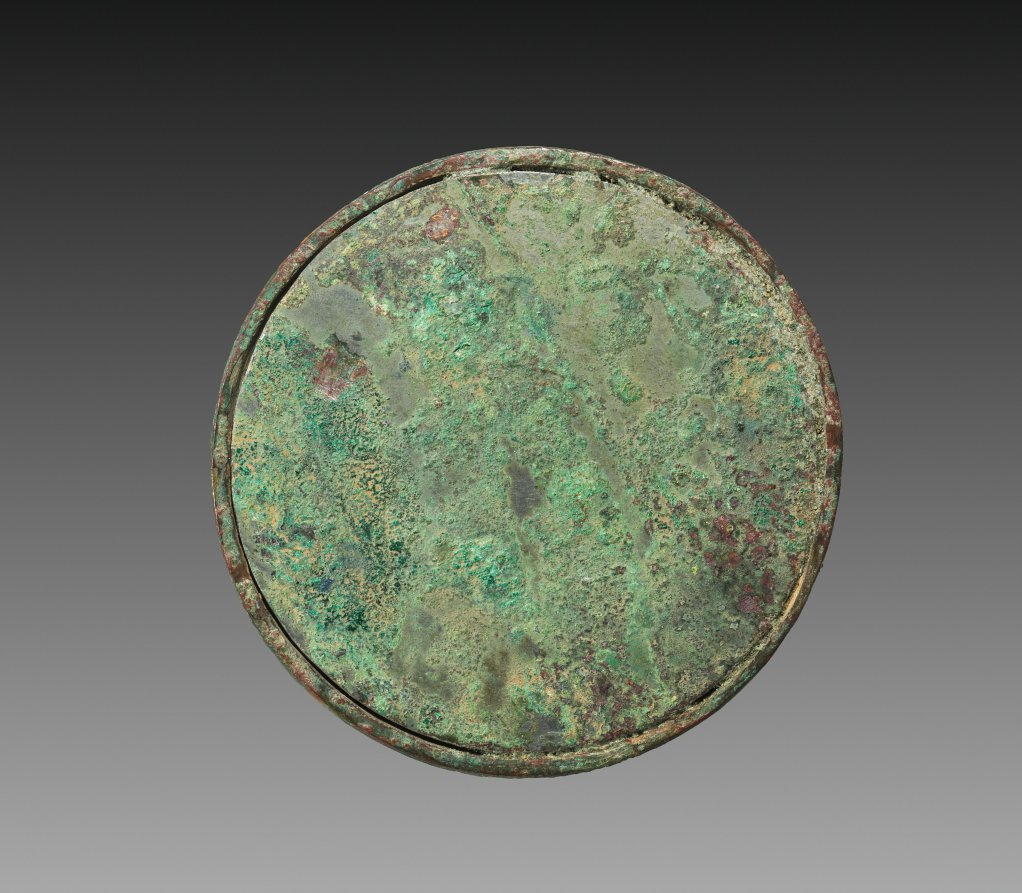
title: Double-tier Mirror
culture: China, Warring States period (475–221 BCE)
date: 300s BCE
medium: bronze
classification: Metalwork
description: The craft of mirror making prospered remarkably during the Warring States period, as bronzes increasingly served as luxury items for individuals. A variety of ornamentations appear on the backs of mirrors, some of which bear resemblance to those found in contemporary jades, lacquer wares, and textiles—all luxury items of the day. This tiny round mirror belongs to the rare double-cast type. It consists of two different layers: a reflective disc with a central knob at the back, and a ring with openwork designs of undulating serpents.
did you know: This luxury object consists of two different layers: a reflective disc with a central knob on the back, and a ring with openwork serpent designs.